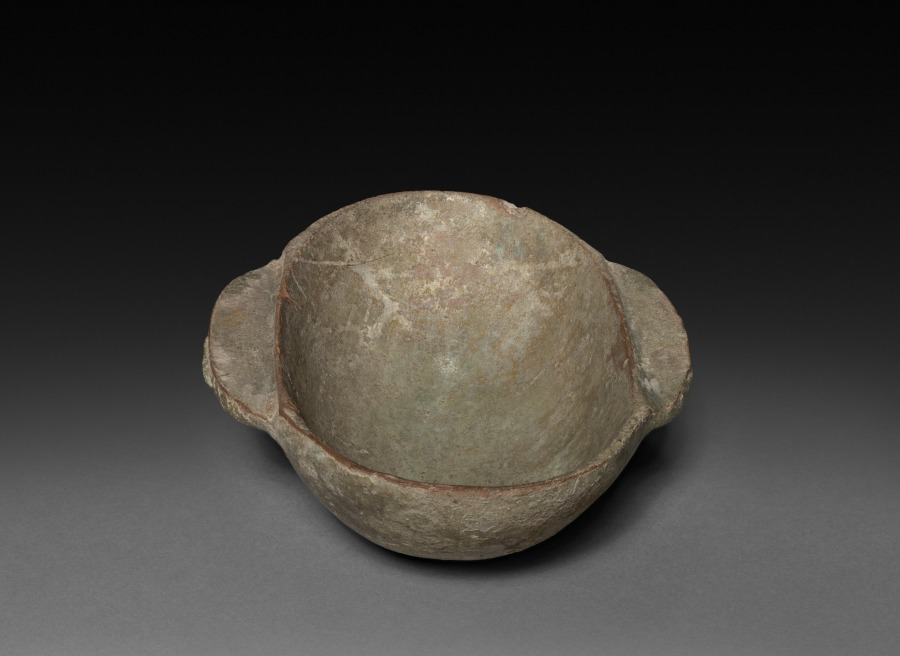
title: Ear Cup (Erbei) for Wine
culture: China, Han dynasty (202 BCE–220 CE)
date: 206 BCE–220 CE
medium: lead glazed earthenware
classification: Ceramic